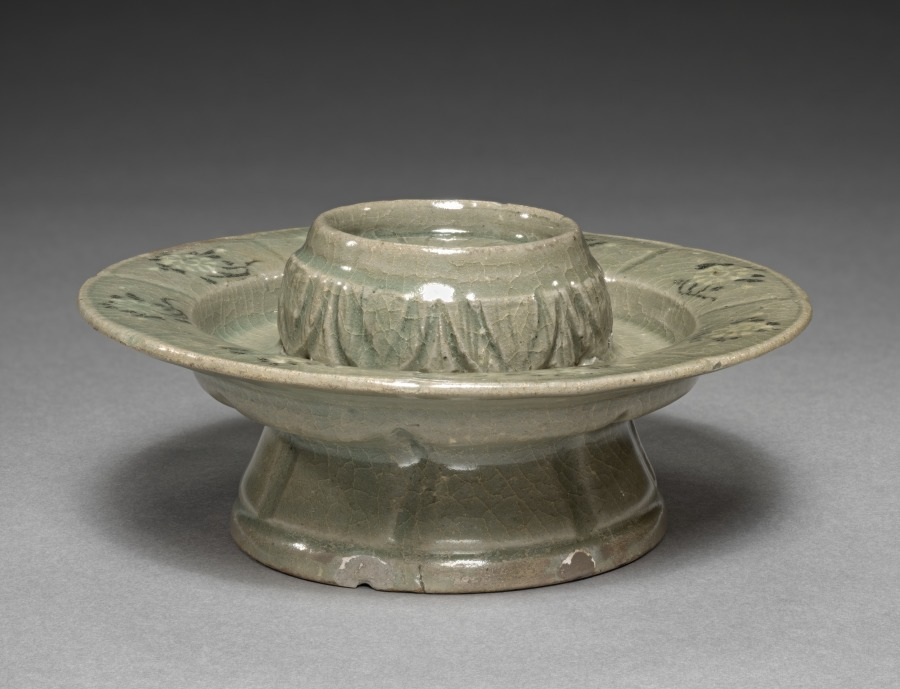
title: Floral-shaped Cup Stand with Inlaid Chrysanthemum Design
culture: Korea, Goryeo dynasty (918–1392)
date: 1100s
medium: inlaid and glazed porcelain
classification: Ceramic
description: As early as the 600s, the practice of drinking tea and wine became an important part of elite culture in Korea. Elites of the Goryeo period commissioned a variety of types of utensils and vessels including this delicate-looking cup stand, not only to make their drinking experience more exciting, but also to show their refined taste.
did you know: During the Goryeo period, a variety of types of tea ware, including this delicate-looking cup stand, were widely used.